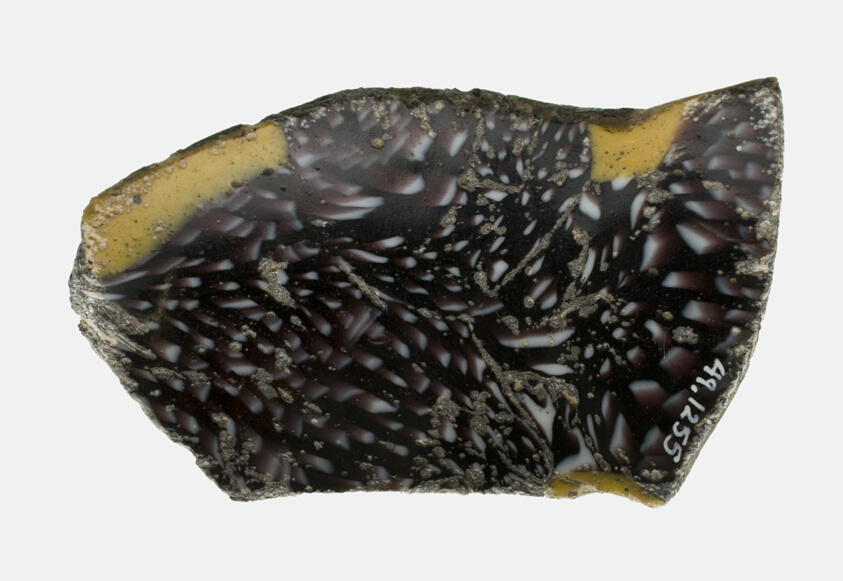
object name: Decorative Arts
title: Fragment of a Bowl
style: roman (ancient, style or period), ancient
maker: Roman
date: 1st century BCE–1st century CE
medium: Glass, mosaic glass technique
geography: Roman Empire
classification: fragment; decorative arts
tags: decoration